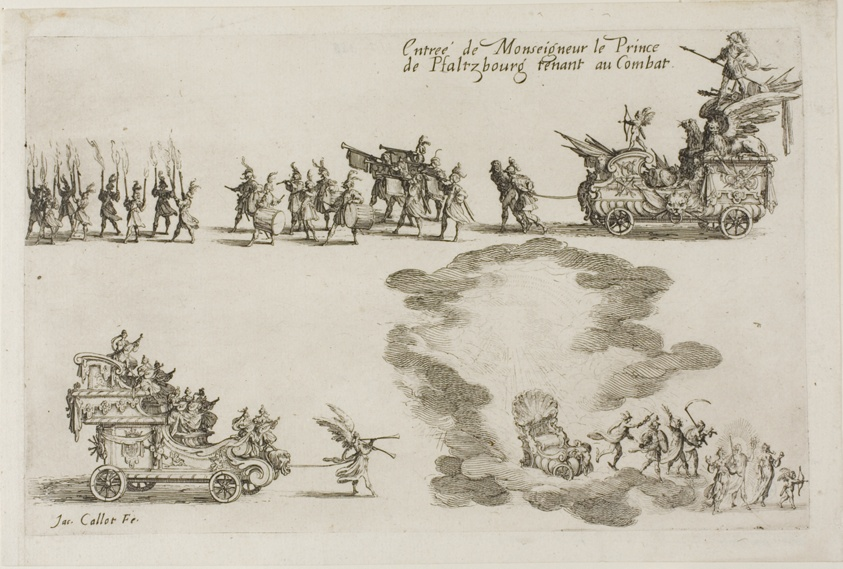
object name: Print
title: Entry of the Monseigneur the Prince of Phalsbourg, Defender in the Combat, from The Combat at the Barrier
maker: Jacques Callot (French, 1592-1635)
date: 1627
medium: Etching on paper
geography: France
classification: etching; print; prints and drawing